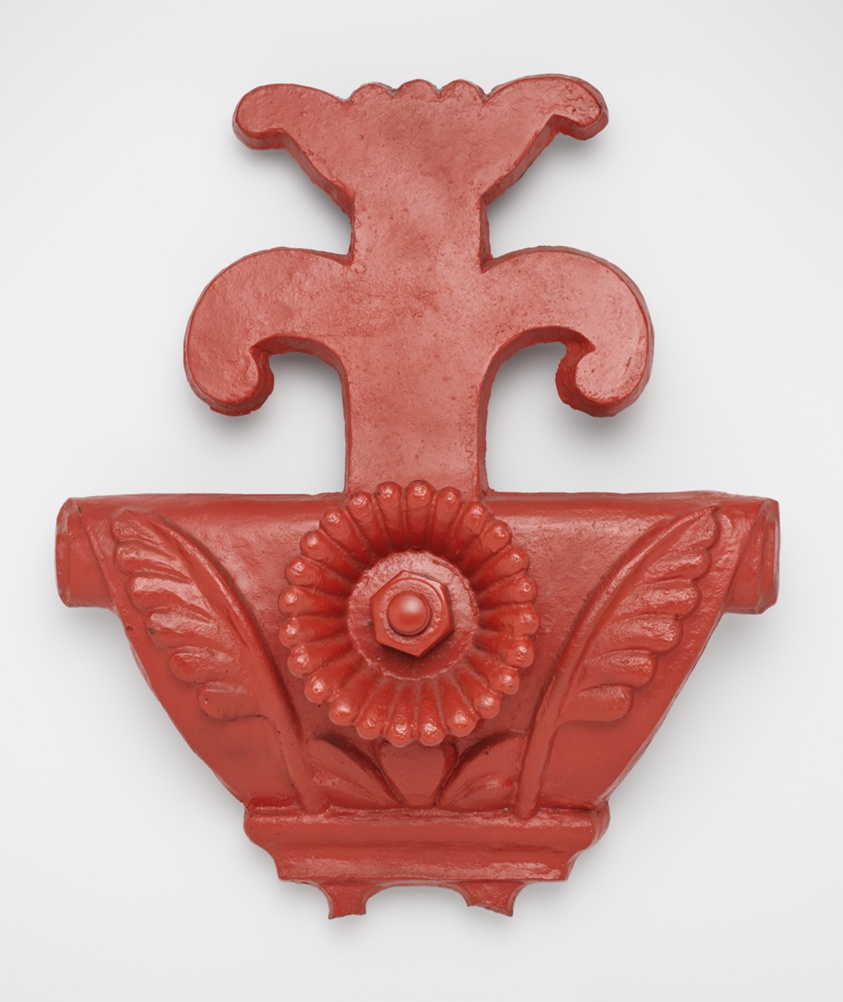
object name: Architectural fragment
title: Anchor Plate from the Pullman-Jennings Building, Chicago, Illinois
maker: Solon Spencer Beman (American, 1853-1914)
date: 1882-83 (demolished 1978)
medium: Painted cast iron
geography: Madison Street, 1214-1222 West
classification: architectural fragment; architecture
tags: Chicago